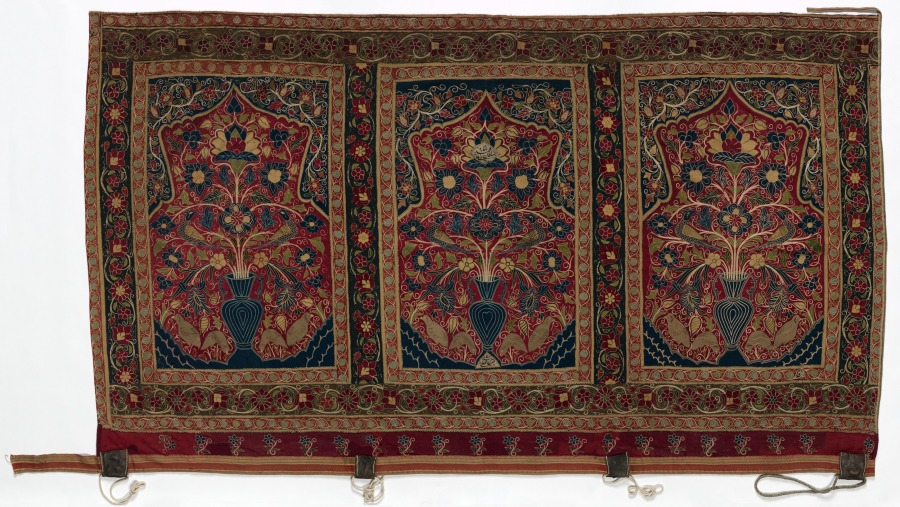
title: Royal Round Tent made for Muhammad Shah (wall panel with three design units)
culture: Iran, Rasht, Qajar period (1779-1925)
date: 1834–48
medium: Wool with silk embroidery (chain stitch), rope, cotton, leather, tape; Rasht work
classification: Textile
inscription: Inscriptions: The central design unit of this wall panel has two embroidered inscriptions. 1. Upper inscription (center of the top blossom): "Muhammad shah sultan-e ghazi."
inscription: 2. Lower inscription (on the base of the vase): "Kamtarin bandeh-ye dargah fath'ali."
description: Royal tents were potent symbols of authority, wealth, and power throughout the greater Middle East. Rulers owned thousands of tents. They were used for shelter, shade, and innumerable functions in tent compounds that were essential for imperial ceremonies, travel, and military campaigns. Distinguished by size with elaborately decorated interior walls and ceilings, tents could be as large as castles. Opulent tents were also presented as imperial gifts. Tents are only known through documents before 1600. For example, in Baghdad in 809, Caliph Harun al-Rashid owned 4,000 ceremonial tents and 150,000 camping tents that were stored in the imperial Abbasid treasury. An astonishing variety and quantity of tents were housed in the royal Fatimid tent storeroom in Cairo in 1068-69, including "military tents, fortress tents, and castle tents, manufactured of . . . gold-brocaded stuff embroidered with designs of elephants, wild beasts, horses, peacocks, birds." Since 1600, Ottoman Turkish tents with elaborate floral decoration have been preserved in Istanbul in the Topkapi Palace Museum and Military Museum, and in European collections as war booty, primarily from the Ottoman Turks' attempt to conquer Vienna in 1683. These tents are not done in the Rasht technique, but rather are applique. In contrast, royal tents from Iran are extremely rare. This spectacular ceremonial tent is embroidered with the name of its owner, Muhammad Shah, who ruled Iran from 1834 to 1848 during the Qajar dynasty. The radiant jewellike interior features exuberant flora, blossoming vines, and robust birds made with colored wool embellished with silk-thread embroidery.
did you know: Rasht work is named after the city on the Caspian Sea in present-day Iran, which was a major silk trade center with numerous textile workshops.